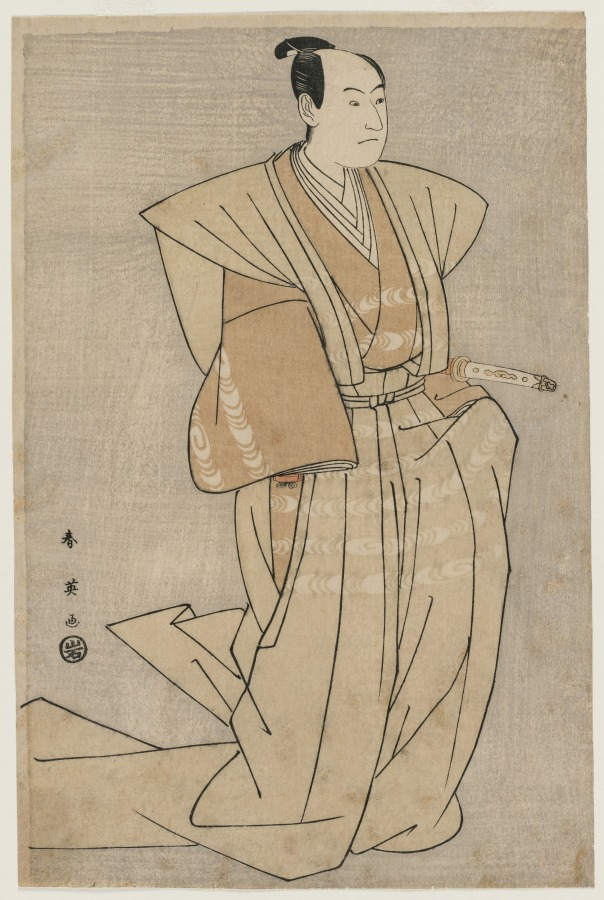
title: Sawamura Sojuro III as Enya Hangan in Kanadehon Chushingura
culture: Japan, Edo period (1615–1868)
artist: Katsukawa Shunei (Japanese, 1762–1819)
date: 1795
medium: color woodblock print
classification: Print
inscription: Signature: Shunei ga Publisher: Iwatoya Kisaburo (emblem)